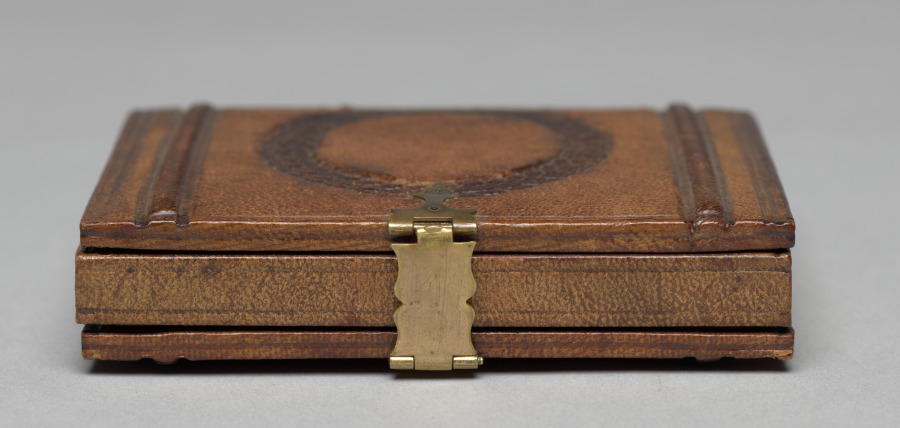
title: Seated boy in tasseled cap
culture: America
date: c. 1858–61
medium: ambrotype, sixth plate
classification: Photograph